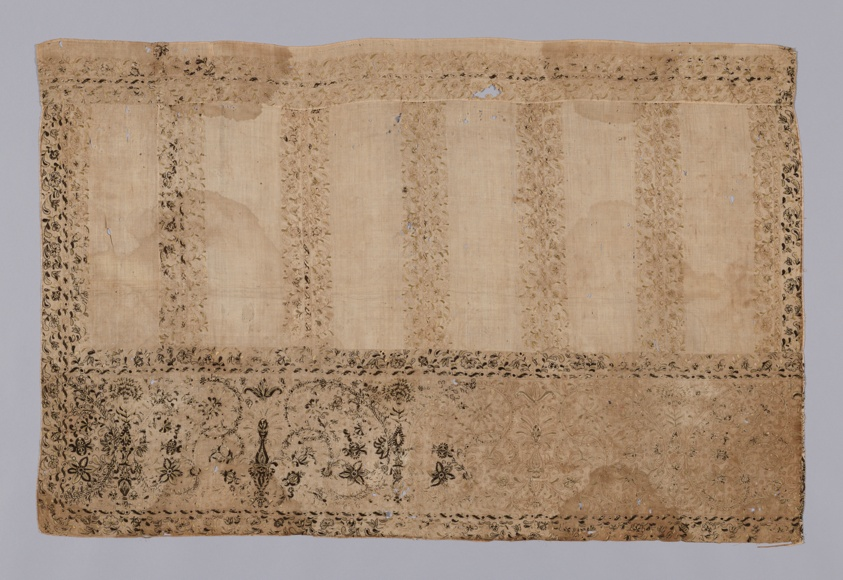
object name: Religious/Ritual Object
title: Altar Cloth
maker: Spain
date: 1675/1700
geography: Spain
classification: textile; needlework (visual works); altar; ritual objects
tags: altar